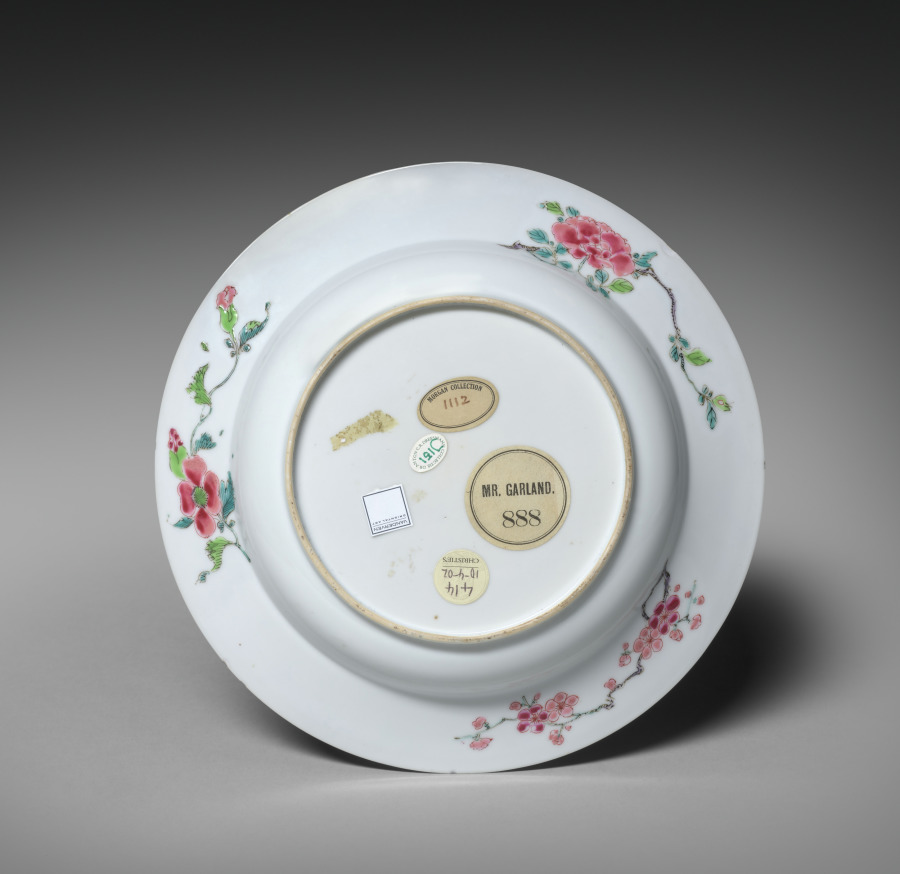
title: Fishermen Plate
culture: China, Qing dynasty (1644–1911), Yongzheng reign (1723–35)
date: c. 1730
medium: porcelain with famille rose enamel overglaze decoration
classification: Ceramic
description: The plate shows four fishermen holding nets and creel. The plate was made during the Yongzheng reign known for its fine porcelain decoration in famille rose colors. Similar scenes of fishermen on paintings of the Ming and Qing period illustrate the popularity of the theme and its adoption by craftsmen and potters.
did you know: The labels on the plate’s base testify the plate was in the former Garland and the Morgan collections.